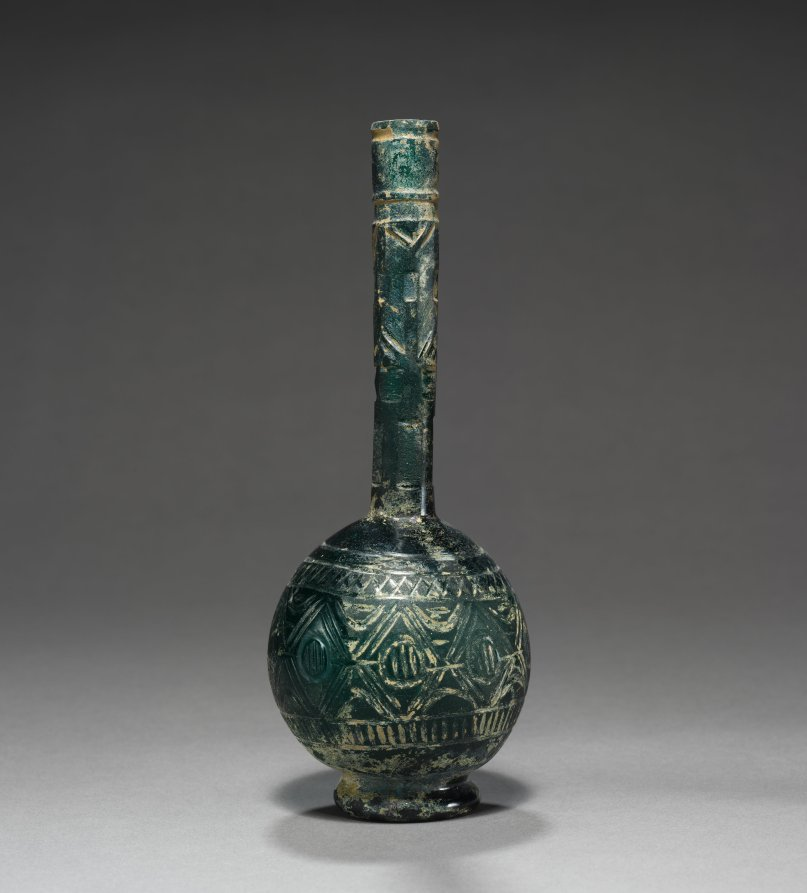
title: Bottle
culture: Iran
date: 800s–900s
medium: glass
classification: Glass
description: This dark blue-green glass bottle has a wide decorative band with a geometric pattern carved on its body and neck.